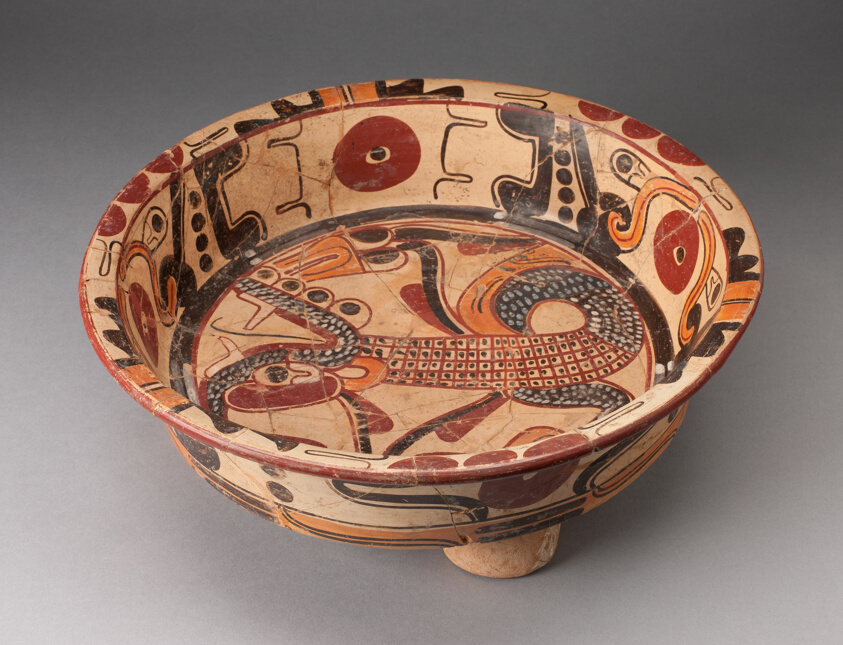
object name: Vessel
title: Tripod Polychrome Bowl Depicting a Serpent with Feathers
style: classic veracruz, mesoamerican, Pre-Columbian, americas, Arts of the Americas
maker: Classic Veracruz; Los Tuxtlas, southern Veracruz, Mexico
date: 500–750 CE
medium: Ceramic and pigment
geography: Southern Veracruz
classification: bowl; earthenware; ceramics; vessel; art of the americas